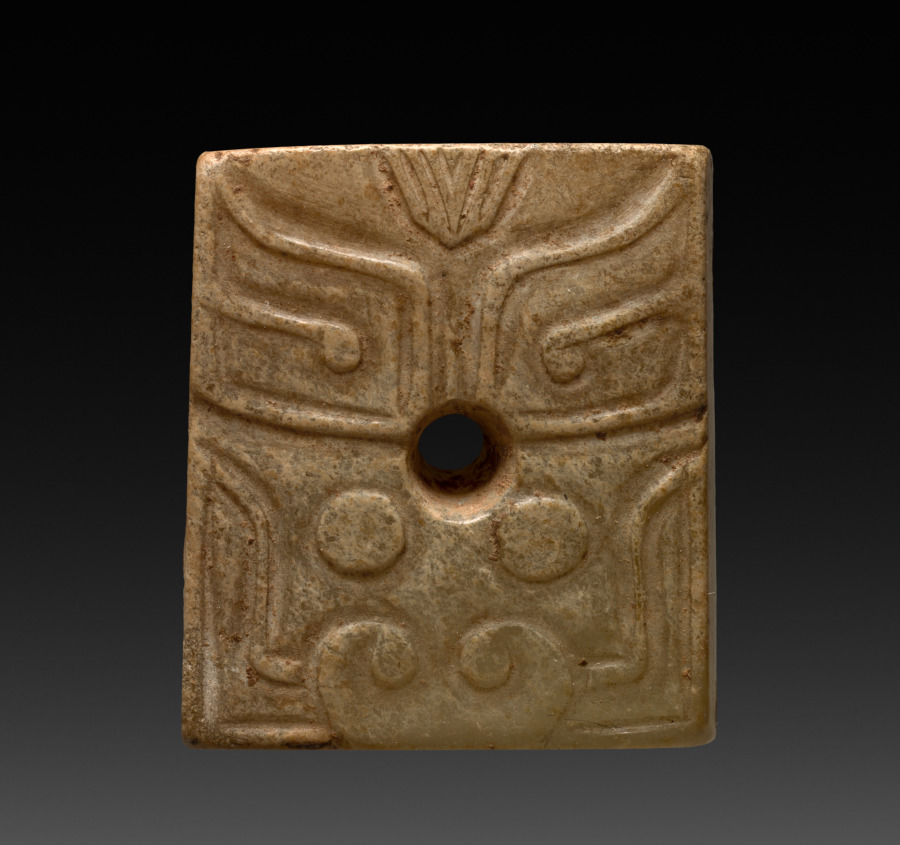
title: Prismatic Bead with Ogre Mask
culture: China, Western Zhou dynasty (c. 1046–771 BCE)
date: 1100–900 BCE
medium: Jade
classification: Jade